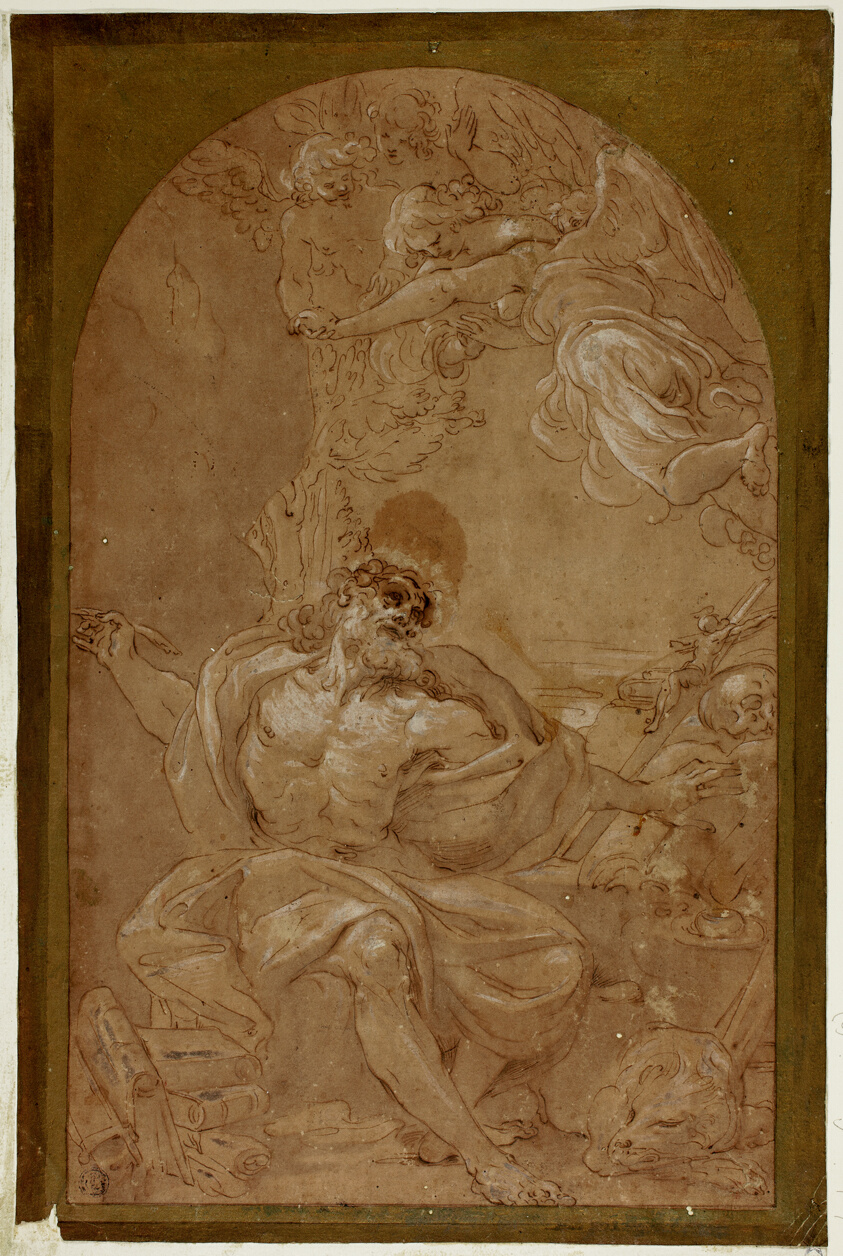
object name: Drawing and Watercolor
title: Study for Saint Jerome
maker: After Ludovico Carracci; Italian, 1555-1619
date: after 1598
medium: Pen and brown ink, with brush and brown wash and traces of graphite, heightened with lead white (partially oxidized), on tan laid paper, laid down on cream laid card prepared with gold paint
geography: Italy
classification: pen and ink drawings; drawings (visual works); prints and drawing